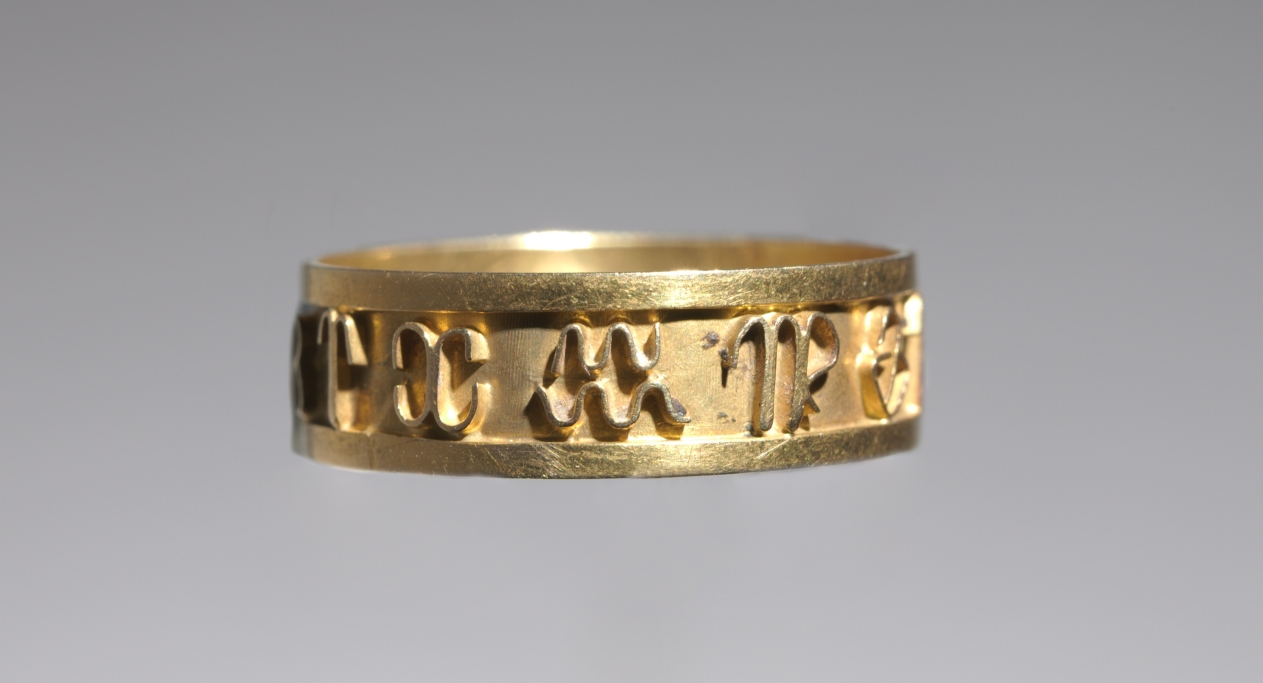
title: Ring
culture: Africa, North Africa, unknown maker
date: 1700s–1800s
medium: Gold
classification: Jewelry